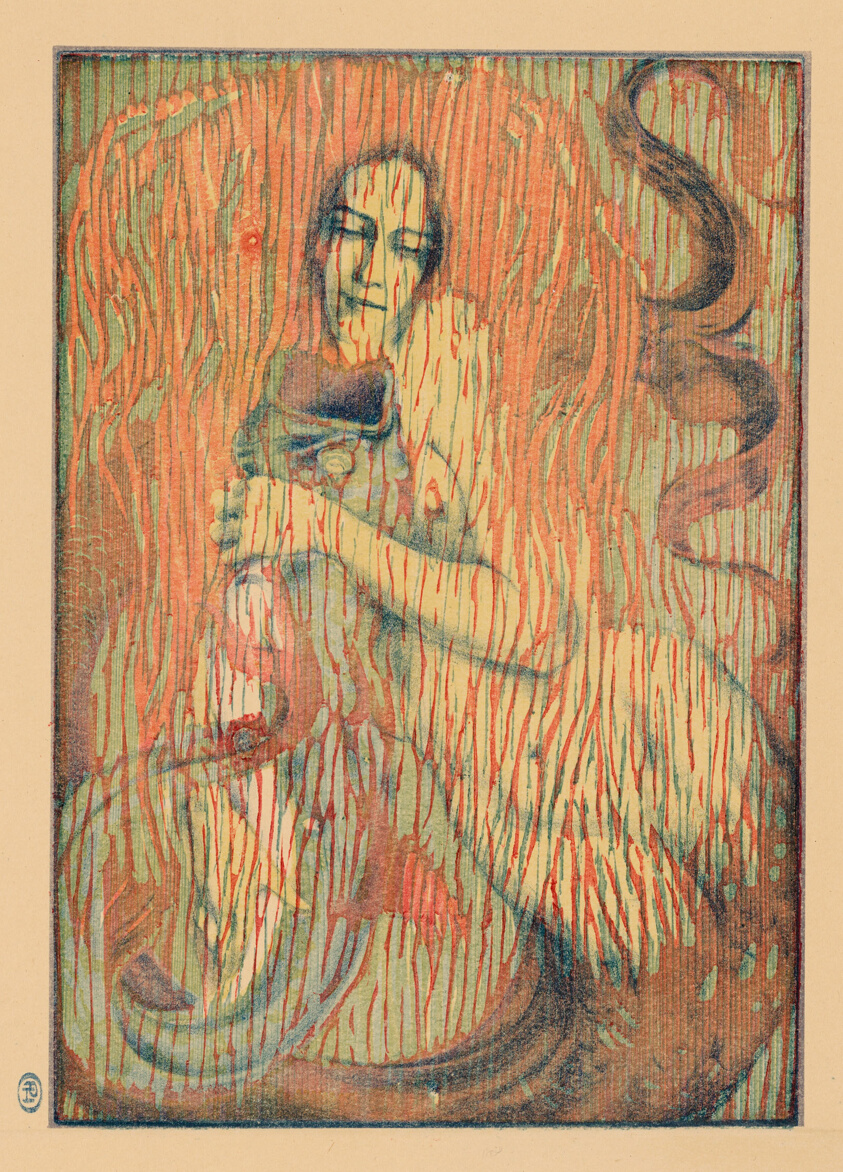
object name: Print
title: Playful Mermaid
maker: Henri Héran (née Paul Herrmann) (German, 1864–1940); published by Pan (German and French, 1895-1900)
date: 1897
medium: Color woodcut from three blocks and lithograph in blue on tan wove paper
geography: Germany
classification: woodcut; print; prints and drawing